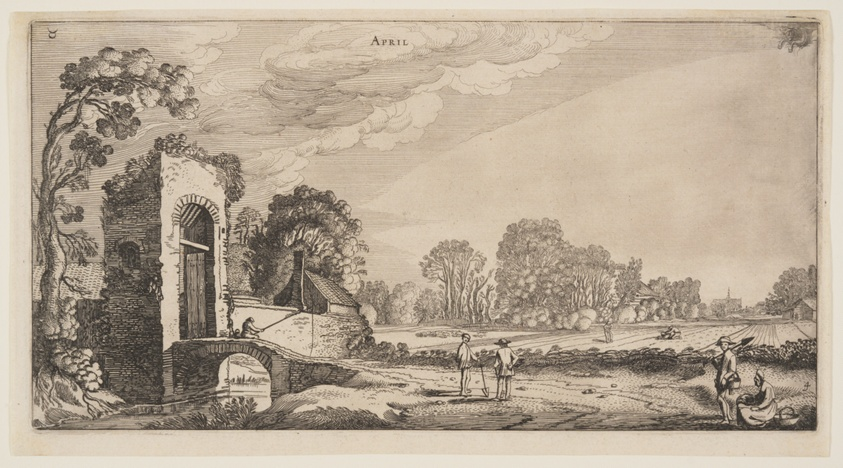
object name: Print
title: April, from The Twelve Months of the Year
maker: Jan van de Velde II (Dutch, c. 1593–1641); after Willem Buytewech (Dutch, c. 1591–1624)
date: 1616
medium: Etching on ivory laid paper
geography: Netherlands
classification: etching; paper; print; prints and drawing